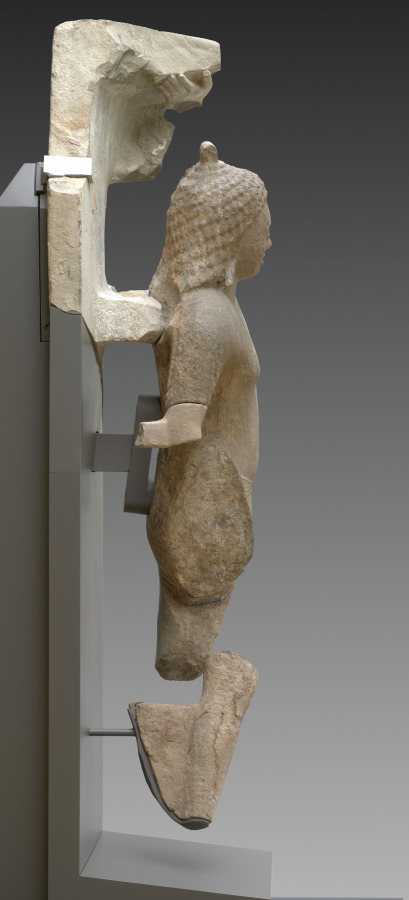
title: Krishna Lifting Mount Govardhan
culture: Southern Cambodia, Takeo Province, Phnom Da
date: c. 600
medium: Sandstone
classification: Sculpture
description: This masterwork of early Cambodian sculpture shows the Hindu god Krishna effortlessly holding aloft a mountain to protect his fellow villagers and herds from torrential storms sent by a jealous old god. It is one of eight monumental monolithic figures recovered from a two-peaked mountain in the floodplains of the Mekong River delta, on the outskirts of the ancient urban center of Angkor Borei.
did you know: Gold earrings were once fastened to the sculpture using holes in the figure's earlobes.